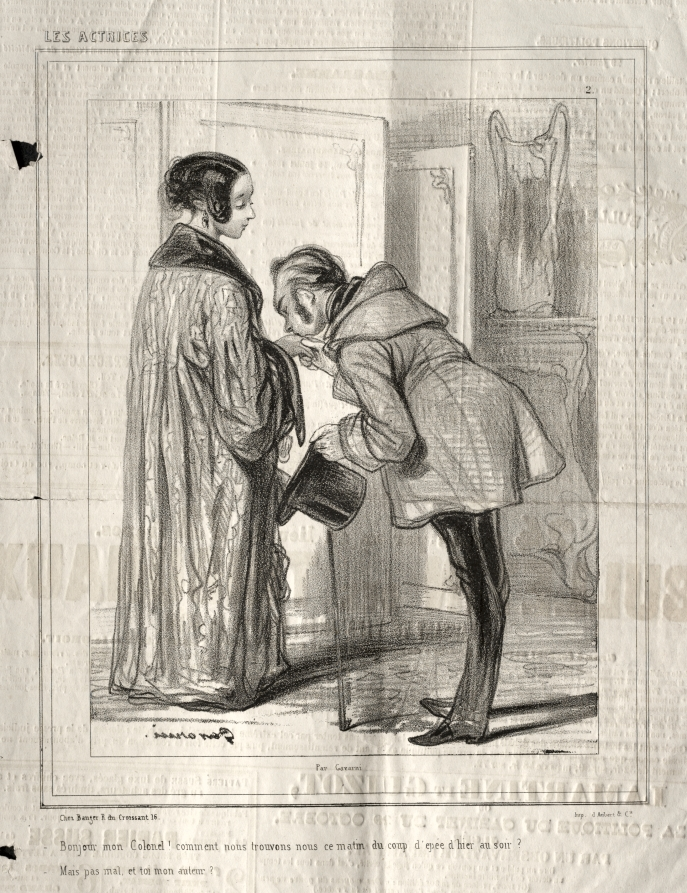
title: Les Actrices: Bonjour mon Colonel!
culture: France, 19th century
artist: Paul Gavarni (French, 1804–1866)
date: 1843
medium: lithograph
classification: Print